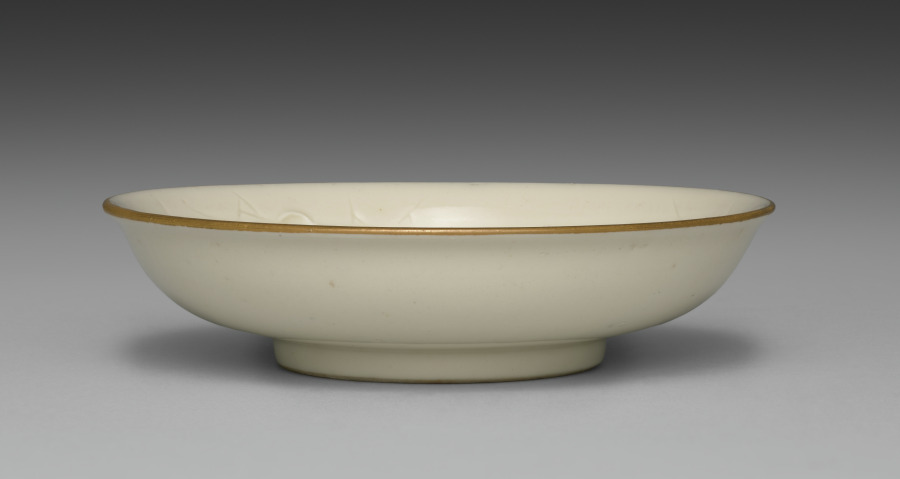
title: Small Dish from Dining Set with Plum Blossoms and Cracked-Ice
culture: Japan, Meiji period (1868–1912)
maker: Seifū Yohei II (Japanese, 1844–1878)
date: c. 1875–78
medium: Porcelain with molded designs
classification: Ceramic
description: Each item in this set has a delicate low-relief design of flowering plum branches over scattered, intersecting lines meant to resemble the cracked-ice surface of a frozen body of water and is signed on the base in gold pigment. While Yohei II produced many fine works in underglaze blue, like those produced by Kiyomizu Shichibei, he also made works in quite different styles later in his career, from the early 1870 s. In 1873, he was appointed purveyor to the Industrial Center of Kyoto Prefecture, a designation associated with Kyoto’s efforts to reach an international market through the port of Kobe; and from 1875 until his death, he was involved in national-level projects to present Japanese ceramics across the world. It was during this period that Yohei III was apprenticed to Yohei II, and it has been suggested that this set may in fact be an early example of Yohei III’s work, which he signed with his teacher’s name. Decorated with flowers resembling Japanese textile motifs, the set calls to mind the design of Yohei II’s pair of vases with plum blossoms in the Victoria and Albert Museum. Here, the elaborate trees created for a formal public exhibition setting have been translated into the approachable blossoms of the genteel domestic environment. While the designs are consistent across the pieces, each raised flower petal and pistil and each incised line in the ice was done by hand, so the cups, bowls, and dishes are similar yet unique. The bottoms of two boxes once identified the set’s owner, but the information has been deliberately obscured with black ink. However, inscriptions still visible appear to indicate two occasions, once at the end of July 1886 , and once again in June 1916 , when parts of the set were requested from Hokura in Niigata Prefecture. The location corresponds to a neighborhood in the present-day city of Jōetsu. The surname Tsuji 辻 also appears on a paper tag affixed to one of the box cloths. Future research may possibly reveal more about their provenance. A vase by Yohei III in a private collection combines the formal grandeur of the Yohei II vases in the Victoria and Albert Museum with the gentler design of this dining set, placing flowering plum trees against soft, scalloped-edge clouds resembling those in golden screens.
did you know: The dining wares have a creamy white coloration that the four boxes containing them identify as Korean in style.